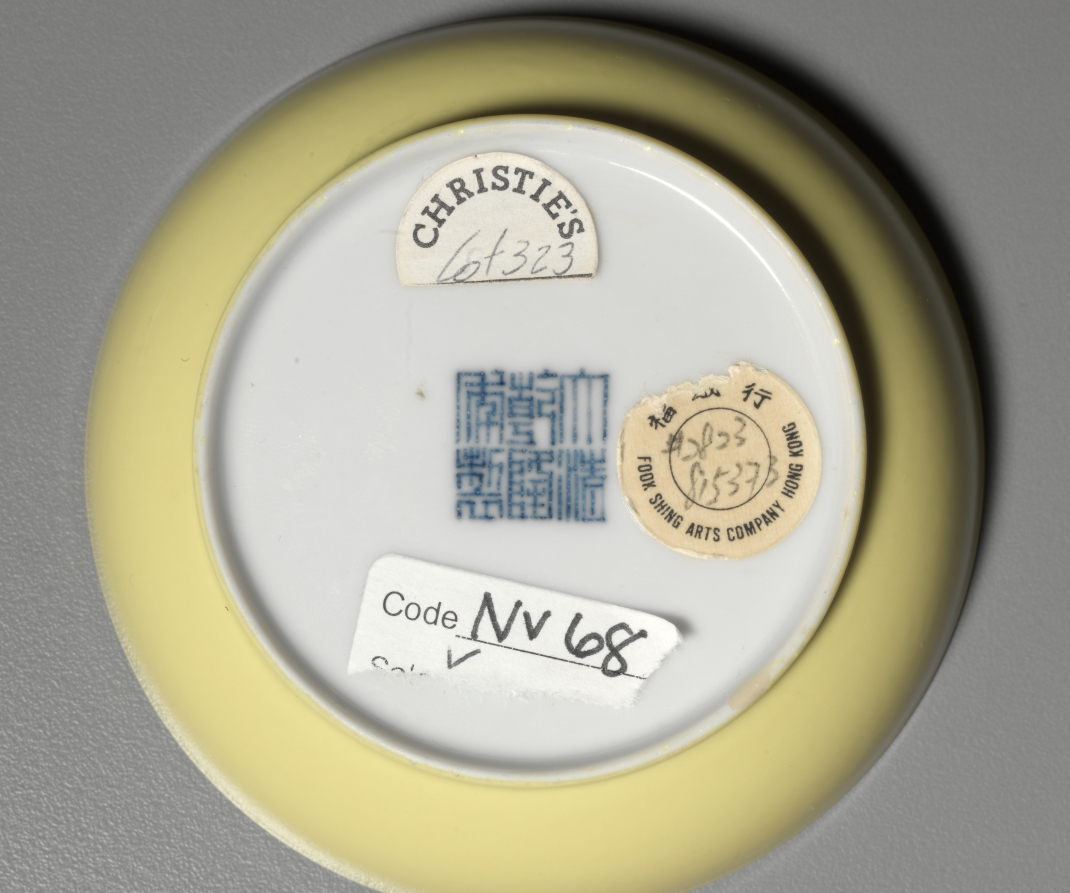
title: Small Dish with Yellow Enamel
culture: China, Qing dynasty (1644-1911), Qianlong mark and reign (1735-1795)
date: 1736–95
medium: enameled porcelain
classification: Ceramic